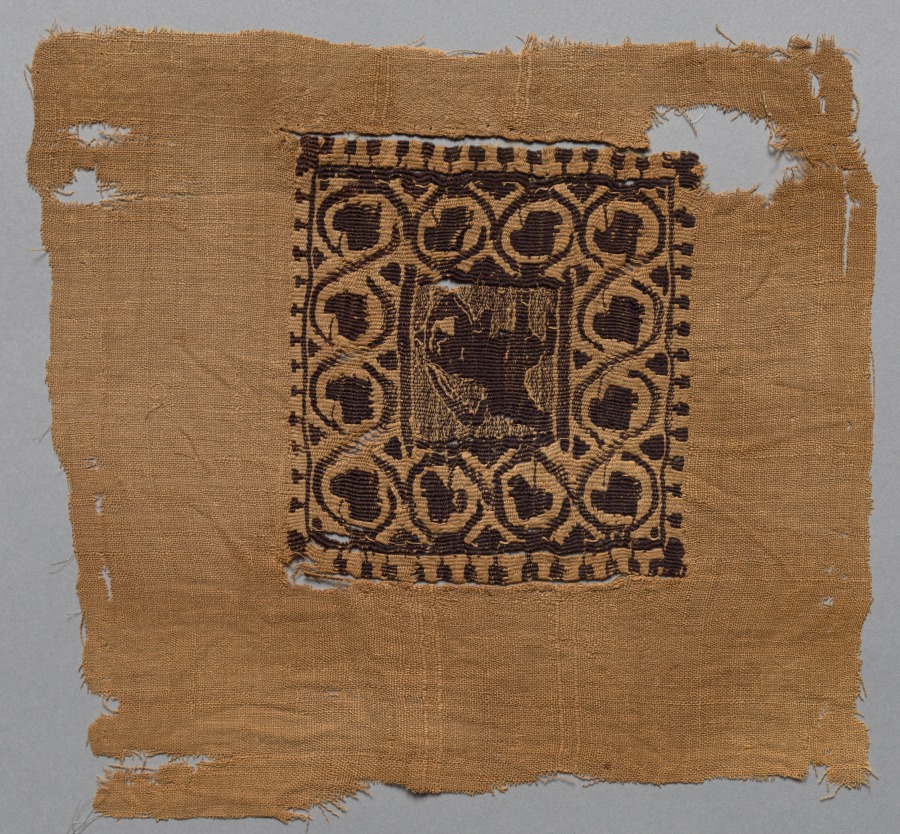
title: Fragment, with Segmentum, from a Tunic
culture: Egypt, Byzantine period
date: 500s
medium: tabby weave, inwoven tapestry ornament; wool and linen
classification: Textile